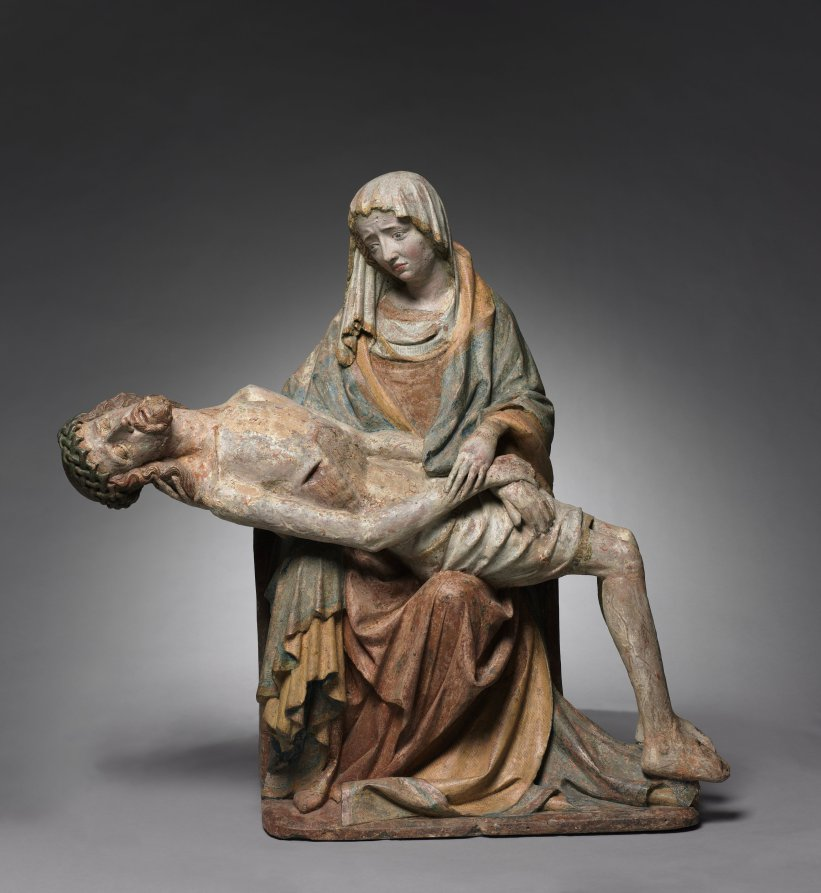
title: Vesperbild (Pietà)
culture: Austria, Steiermark, 15th century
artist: Master of Grosslobming (Austrian)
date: c. 1420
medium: painted cast stone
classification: Sculpture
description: The word vesperbild is the German word for pietà, the image of the Virgin Mary cradling her dead son on her lap. The theme has no literary source; it originated in Germany during the early 1300s and was more widespread in central Europe than in Italy. These devotional sculptures were used within the interior of a church, in small side chapels dedicated to the Virgin. As in this example, they often convey her grief in a sensitive way. For those who prayed before them, vesperbilds were poignant reminders of the Passion of Christ and the suffering of the Virgin.